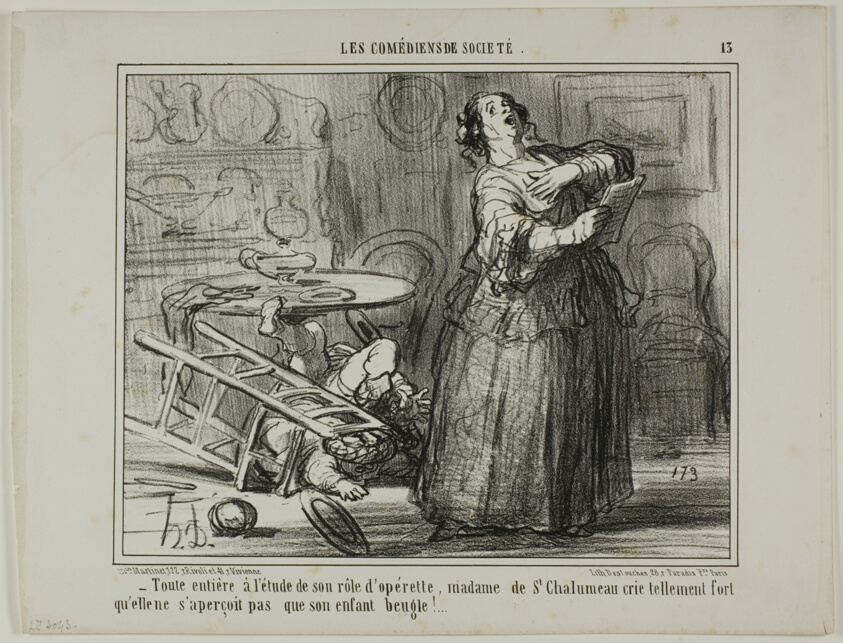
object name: Print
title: - Taken by her operetta part, Madame de St. Chalumeau is shouting so loud that she does not notice the bellowing of her child, plate 13 from Les Comédiens De Société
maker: Honoré Victorin Daumier; French, 1808-1879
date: 1858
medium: Lithograph in black on white wove paper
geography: France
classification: lithograph; print; prints and drawing